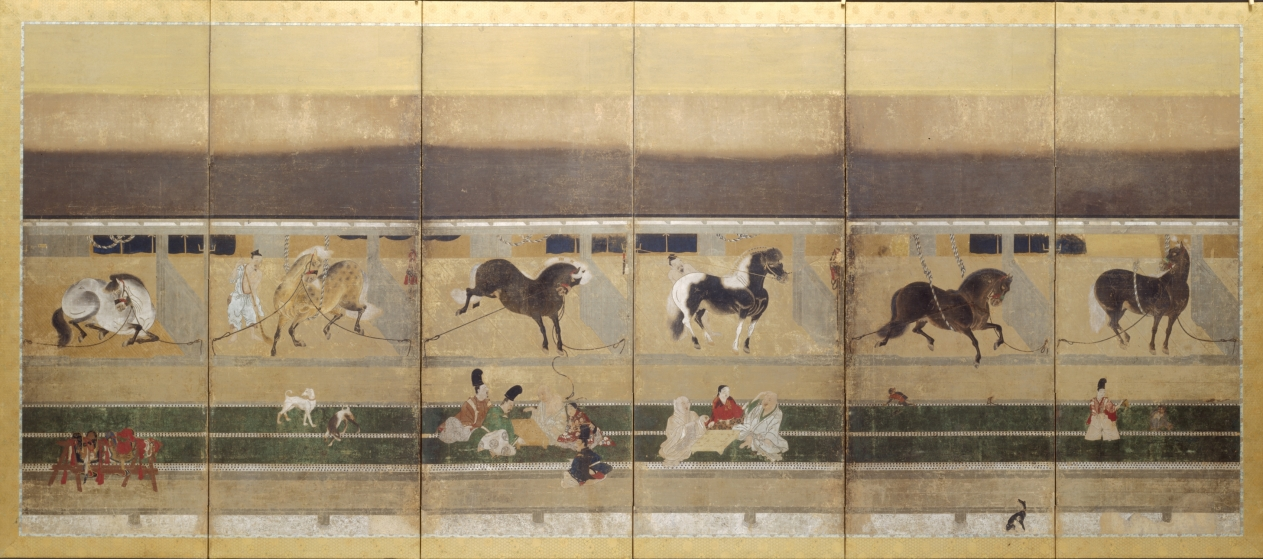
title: Horse Stable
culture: Japan, Muromachi period (1392–1573)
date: early 1500s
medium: One of a pair of six-panel folding screens; ink, color, and gold on paper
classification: Painting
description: Prized horses in stables may be the main theme of the pair of screens of which this screen is a part, but a lot of action is happening on the veranda. Falconry is the focus of this screen, and a lively atmosphere develops in the interplay of the dynamic horses and the birds of prey.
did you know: This is the earliest surviving example of the "horse stable" theme in Japanese screens.